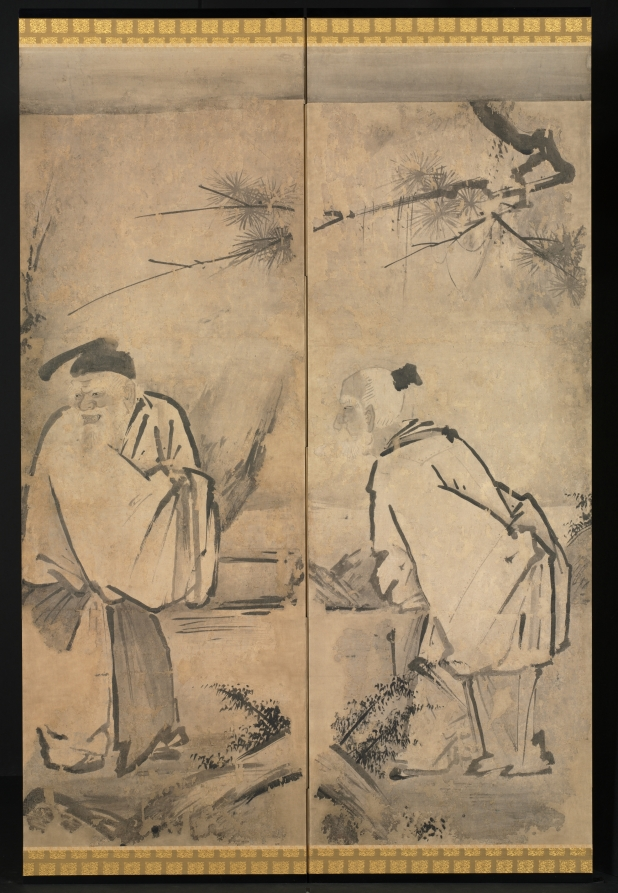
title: Four Elders of Mt. Shang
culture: Japan, Edo period (1615–1868)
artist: Kano Tan’yū (Japanese, 1602–1674)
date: 1600s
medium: pair of six-fold screens; ink on paper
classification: Painting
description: The Kano school was a group of professional artists patronized by the shogun from the late Muromachi period to the Edo period. The group adopted themes of reclusiveness to convey the importance of loyalty to the shogunate. A leader of the Edo Kano school, Kano Tanyu paired Seven Sages of the Bamboo Grove and Four Elders of Mt. Shang to reference a painting of the same theme attributed to Kano Motonobu. Seven Sages of the Bamboo Grove refers to the elites who escaped the social chaos of China’s Wei-Jin period (AD 200s–400s); they fled to a secluded bamboo grove where they could express themselves freely, enjoying pure conversation, music, and wine. The other screen, Four Elders of Mt. Shang, depicts the scholars who left the turbulence of the late Qin dynasty to pursue their scholarly interests in seclusion on Mt. Shang in Shanxi province.